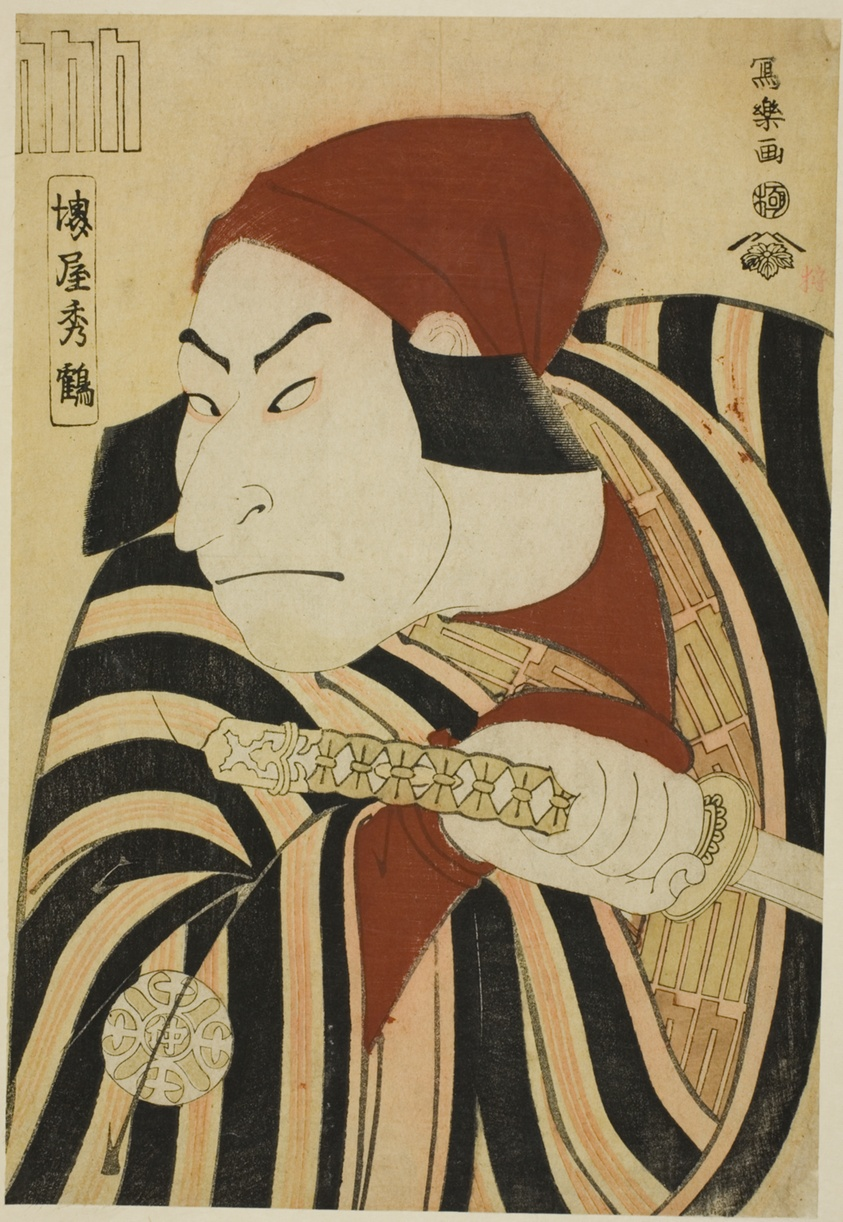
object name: Print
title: Nakamura Nakazo II as Prince Koretaka disguised as the farmer Tsuchizo in the play "Intercalary Year Praise of a Famous Poem (Uruo Toshi Meika no Homare)," performed at the Miyako Theater in the eleventh month, 1794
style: Japanese (culture or style)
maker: Toshusai Sharaku 東洲斎 写楽; Japanese, active 1794-95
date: 1794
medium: Color woodblock print, oban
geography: Japan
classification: woodblock print; print; asian art